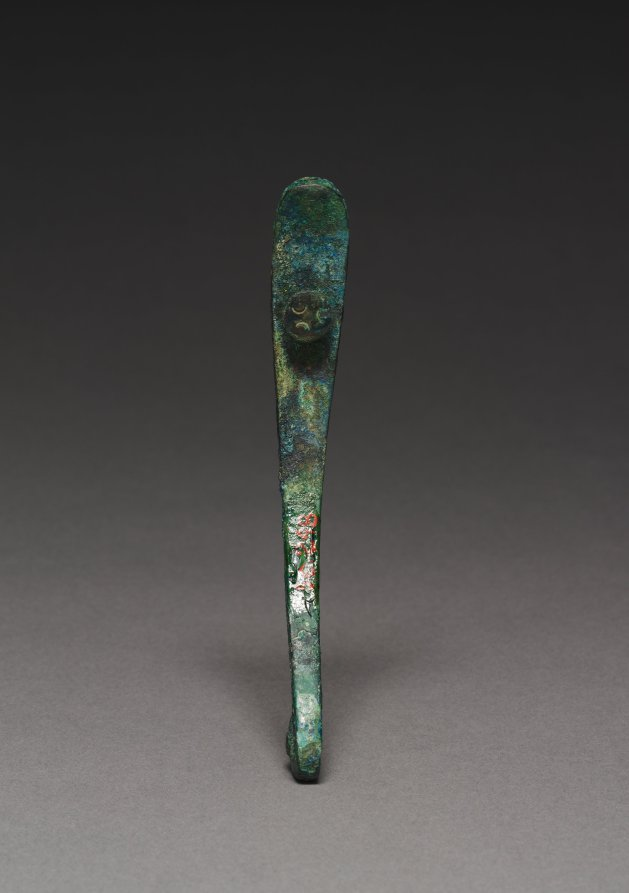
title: Belt Hook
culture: China, Warring States period (475–221 BCE)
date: 475–221 BCE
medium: front: bronze inlaid with gold and turquoise; back: gilt bronze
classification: Metalwork